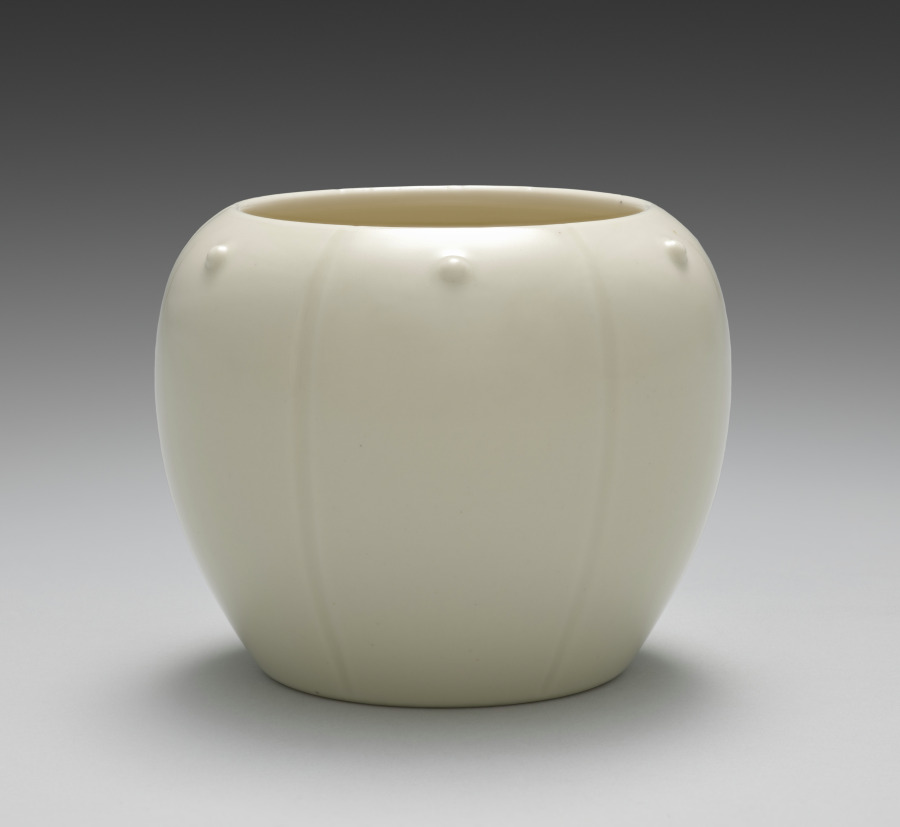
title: Container from Lit Charcoal and Ash Containers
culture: Japan, Meiji period (1868–1912)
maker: Seifū Yohei III (Japanese, 1851–1914)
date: 1893–1914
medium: One from a set of four containers; porcelain with molded design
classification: Ceramic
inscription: 清風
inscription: The storage box for this set is inscribed and impressed with seals.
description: The box lid for these six-lobed lit charcoal and ash containers, or hiire, identifies them as kōhakuji, another of Yohei III’s translucent cream colors over ivory clay bodies. One might translate the name as “lustrous pearl[–glazed ivory] porcelain.” A hiire was filled with ash with burnt coals at the center so that embers and tobacco ash could be discarded safely during a gathering. Each of the lobes on the containers has a round protrusion set below the rim. The studlike pattern is called ruiza. The term is also used to describe the pattern that rings the shoulder of some flower vases or metal kettles used in chanoyu.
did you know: The Seifu studio generally followed the standard practice in Japan for identifying the artist and object in box inscriptions.